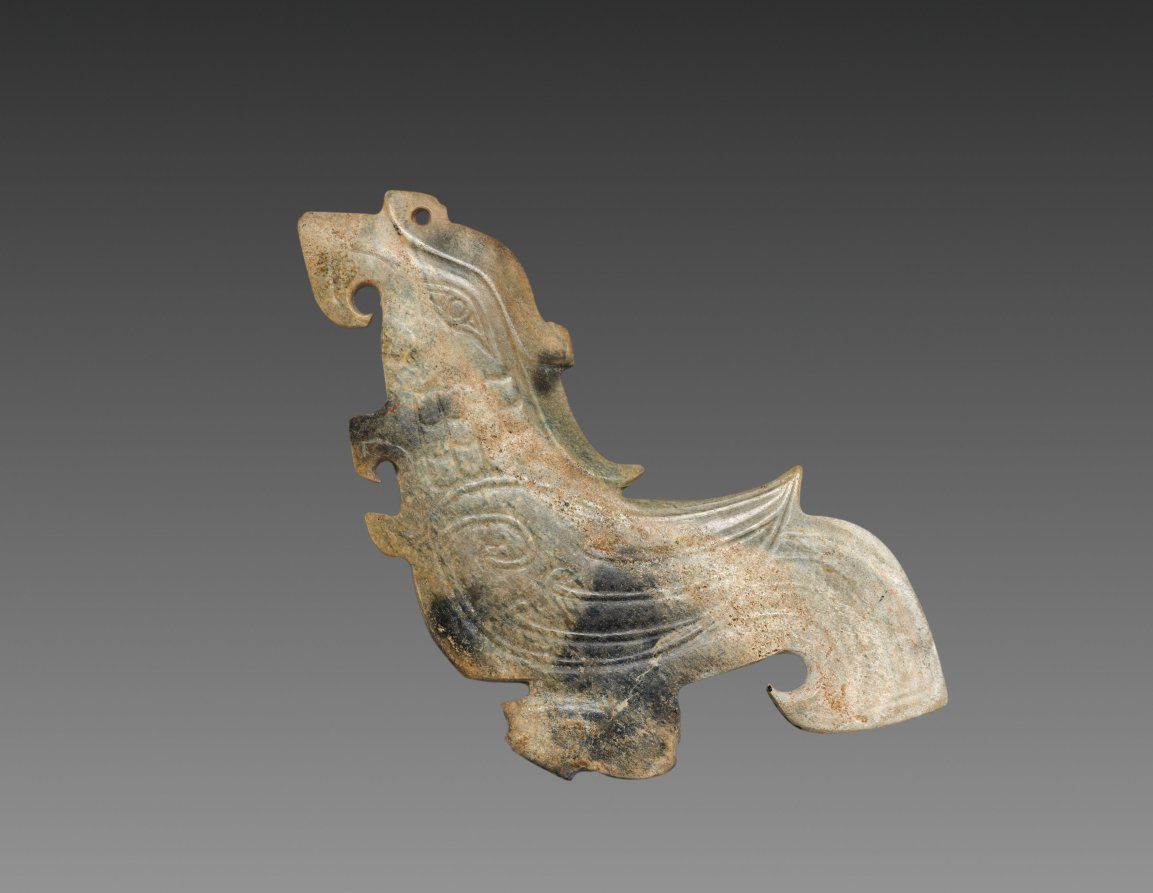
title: Jade Bird Pendant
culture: China, Western Zhou dynasty (c. 1046–771 BCE)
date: c. 1000–mid 900s BCE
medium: nephrite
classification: Jade